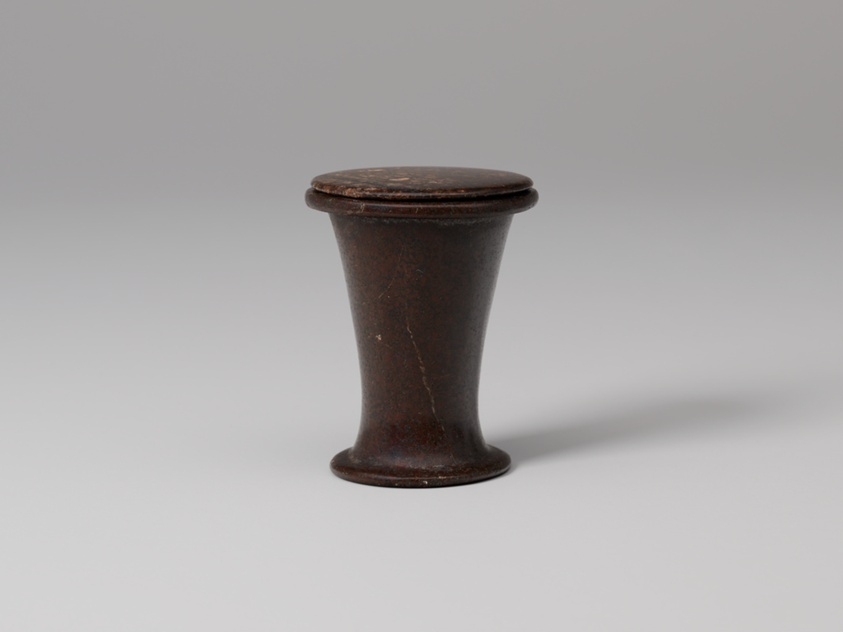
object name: Vessel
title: Unguent Vessel with Lid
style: egyptian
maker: Egyptian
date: Middle Kingdom–early New Kingdom, Dynasty 12–early Dynasty 18, about 1985–1425 BCE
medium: Hematite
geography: Egypt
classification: personal grooming / hygiene / cosmetic container; stone; vessel; ancient art